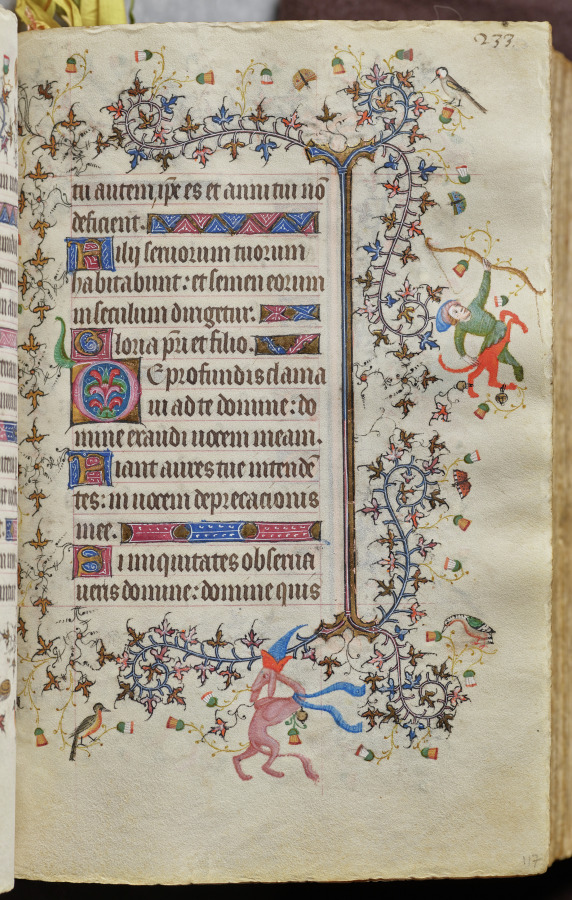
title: Hours of Charles the Noble, King of Navarre (1361-1425): fol. 117r, Text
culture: France, Paris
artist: Master of the Brussels Initials and Associates (French)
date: c. 1405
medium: ink, tempera, and gold on vellum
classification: Bound Volume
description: This precious volume was obviously highly prized by its owner, the French-born King of Navarre, who had his coat of arms painted on no less than twenty folios. Rather than directly commissioning this manuscript from a specific workshop, it seems that Charles the Noble acquired his book of hours -- perhaps ready-made for the luxury market -- while on a trip to Paris in 1404-05. A collaborative effort, six painting styles are evidenced within the pages of this codex, those of two Italians, two Frenchmen, and two Netherlanders. The painter who was responsible for the planning and decoration of the book, and who produced seventeen of the large miniatures, was a Bolognese artist known as the Master of the Brussels Initials. His principal assistant, responsible for most of the borders, was a Florentine who signed his name "Zecho" da Firenze on folio 208 verso.